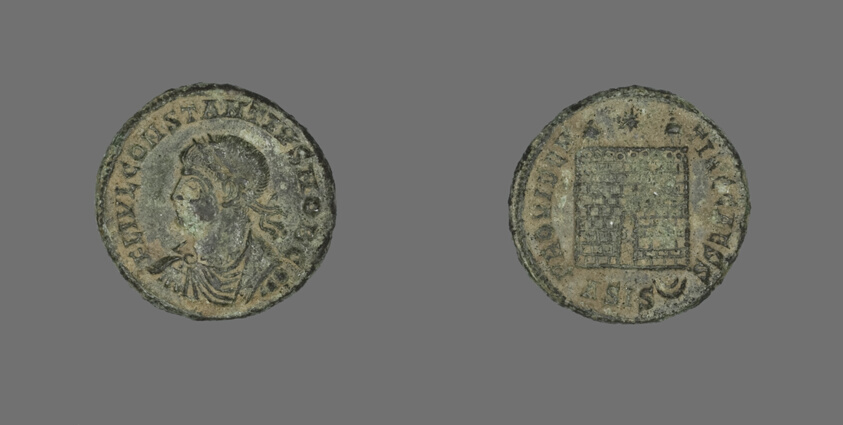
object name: Coin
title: Coin Portraying the Emperor Constantius I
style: roman (ancient, style or period), ancient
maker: Roman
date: 250-306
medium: Bronze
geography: Roman Empire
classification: coin; ancient art